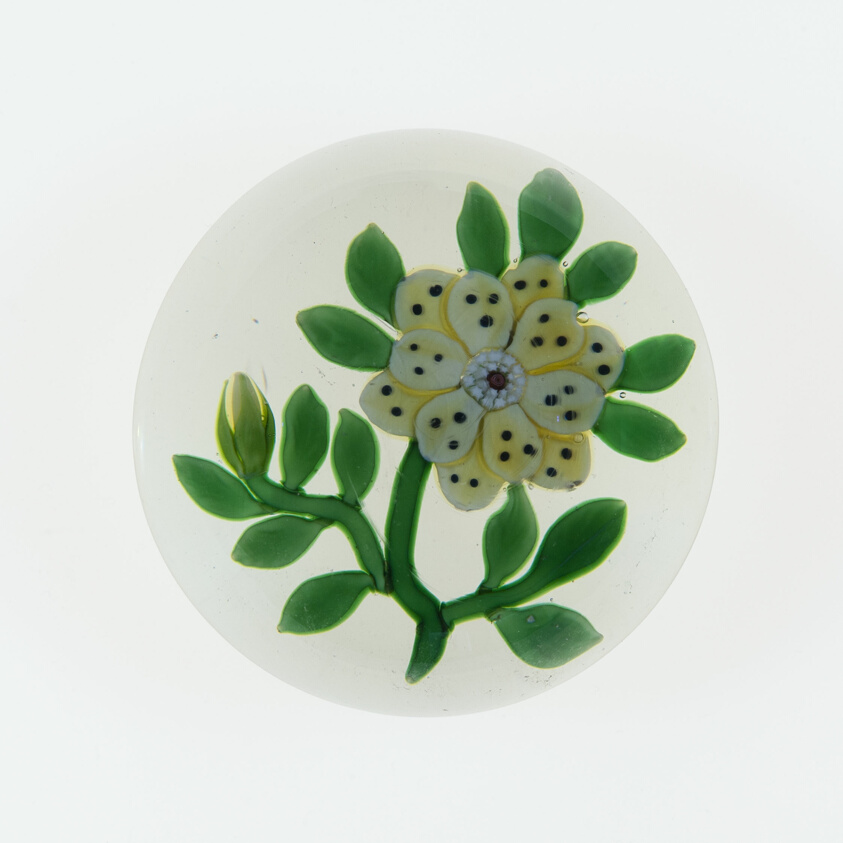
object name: Glass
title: Paperweight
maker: Baccarat Glassworks (Cristalleries de Baccarat); Lorraine, France, founded 1764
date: c. 1845–60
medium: Glass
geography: Baccarat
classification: paperweight; glass